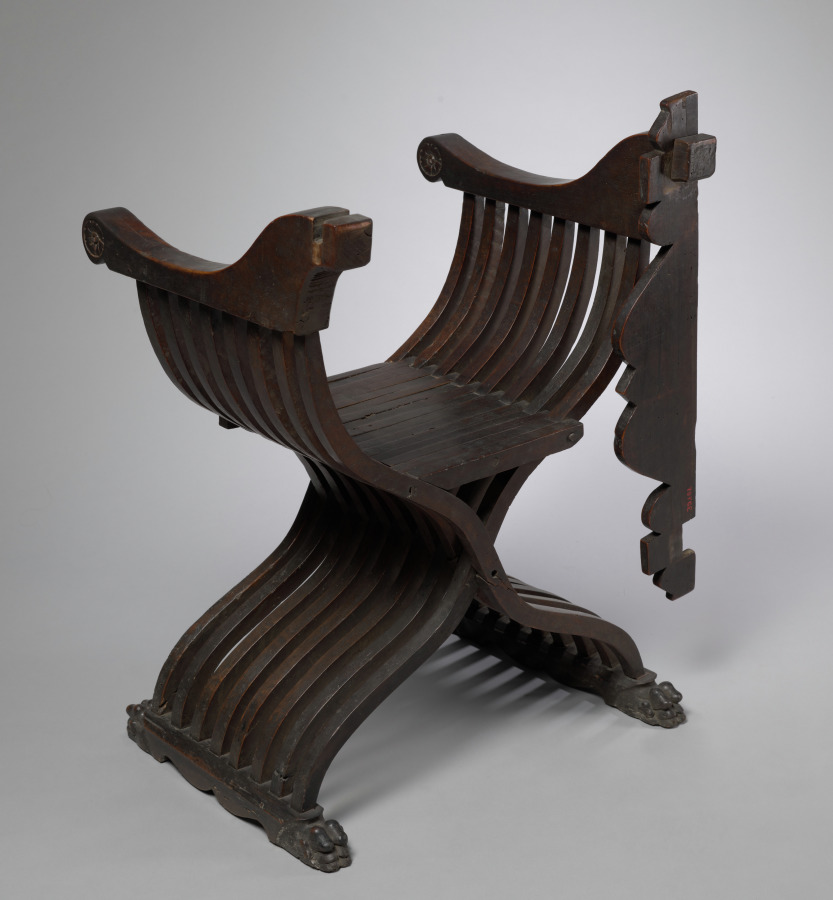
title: Folding Armchair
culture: Italy, early 16th century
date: early 1500s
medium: walnut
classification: Furniture and woodwork